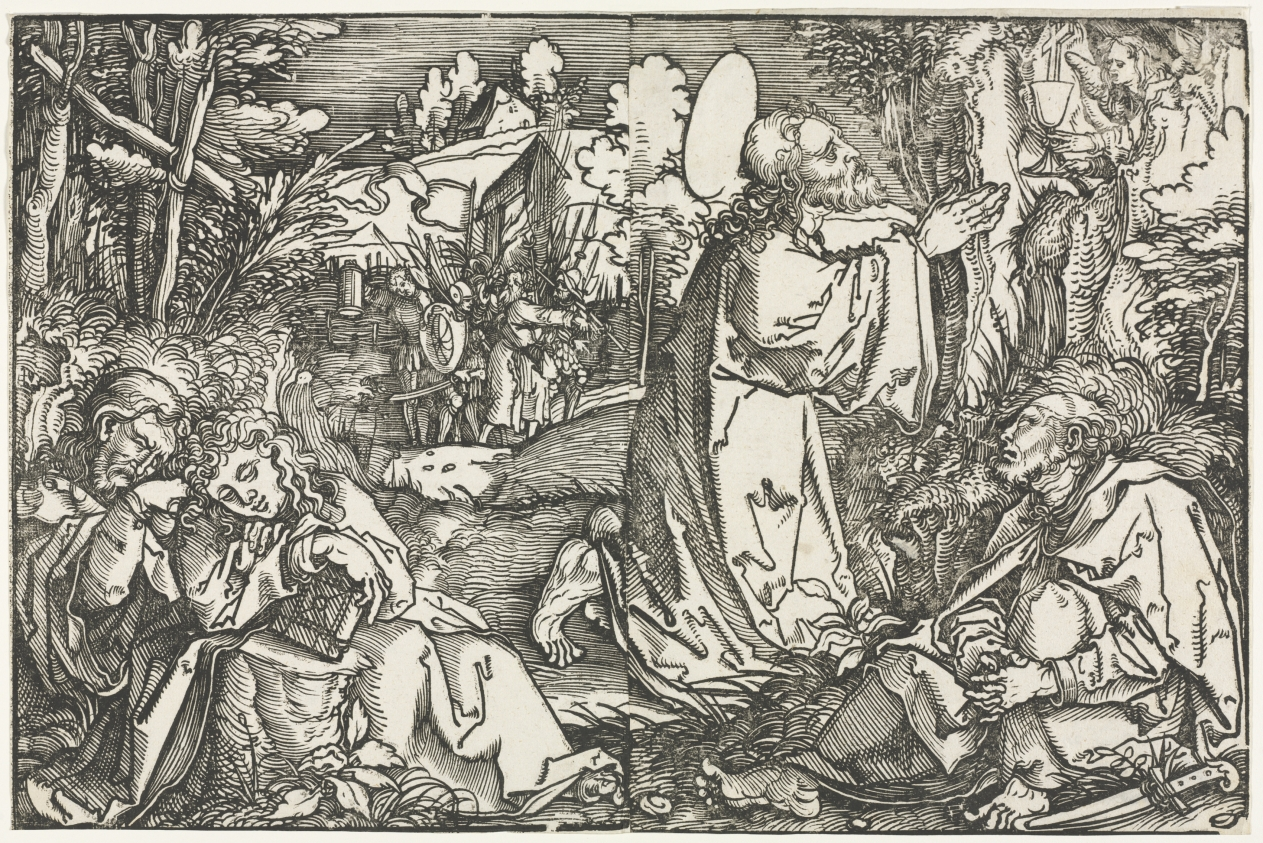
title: The Agony in the Garden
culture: Germany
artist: Hans Weiditz (German, c. 1495-c. 1536)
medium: woodcut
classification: Print